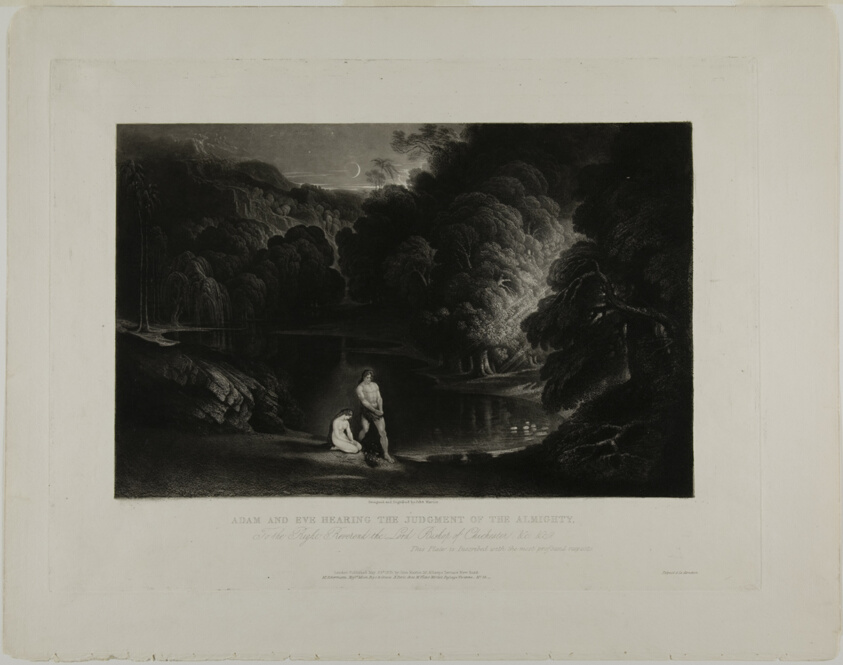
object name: Print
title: Adam and Eve Hearing the Judgement of the Almighty, from Illustrations of the Bible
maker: John Martin (English, 1789-1854)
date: 1831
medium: Mezzotint in black on ivory wove paper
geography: England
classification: mezzotint; print; prints and drawing